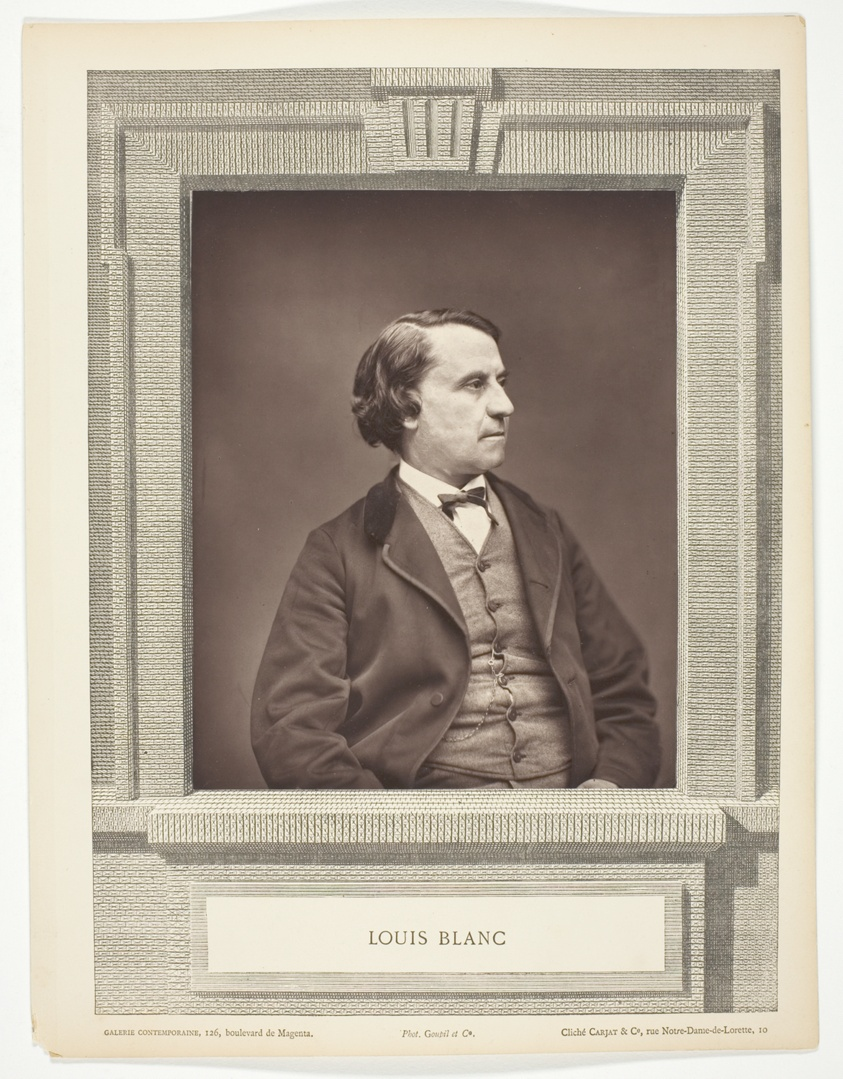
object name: Photograph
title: Louis Blanc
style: 19th century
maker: Carjat et Cie (Studio); French, 19th century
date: c. 1876/77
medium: Woodburytype, from the periodical “Galerie Contemporaine Littéraire, Artistique” (1877), volume 4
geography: France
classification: woodburytype; photomechanical process; photography; photograph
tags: Collected by Hugh Edwards, Contemporaine Littéraire